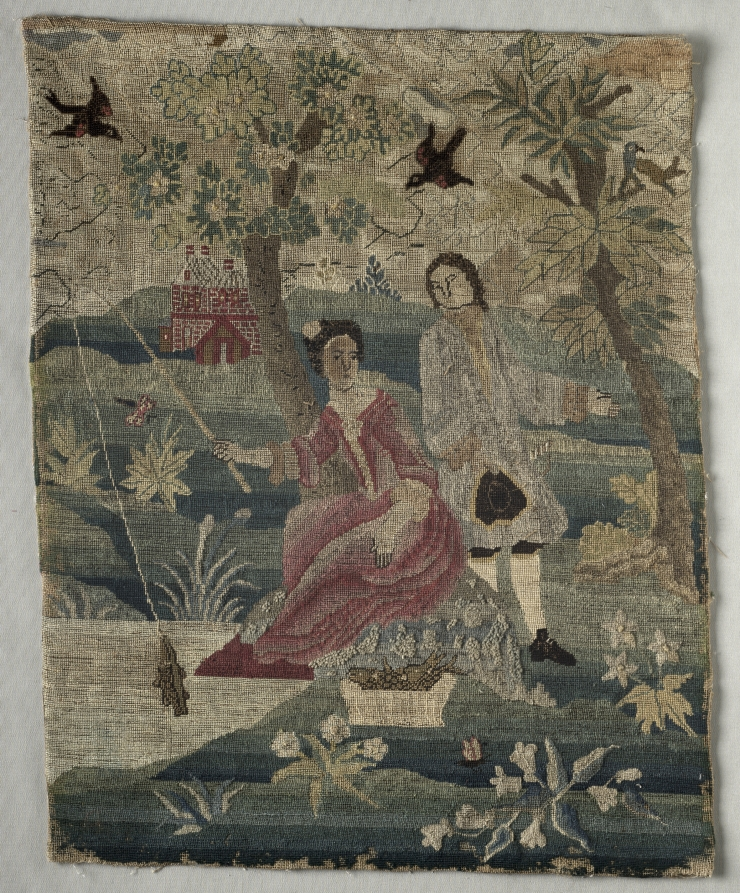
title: "Fishing Lady"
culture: America, Massachusetts, Boston, 18th century, 1st half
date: 1700s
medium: plain weave linen? with embroidery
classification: Embroidery